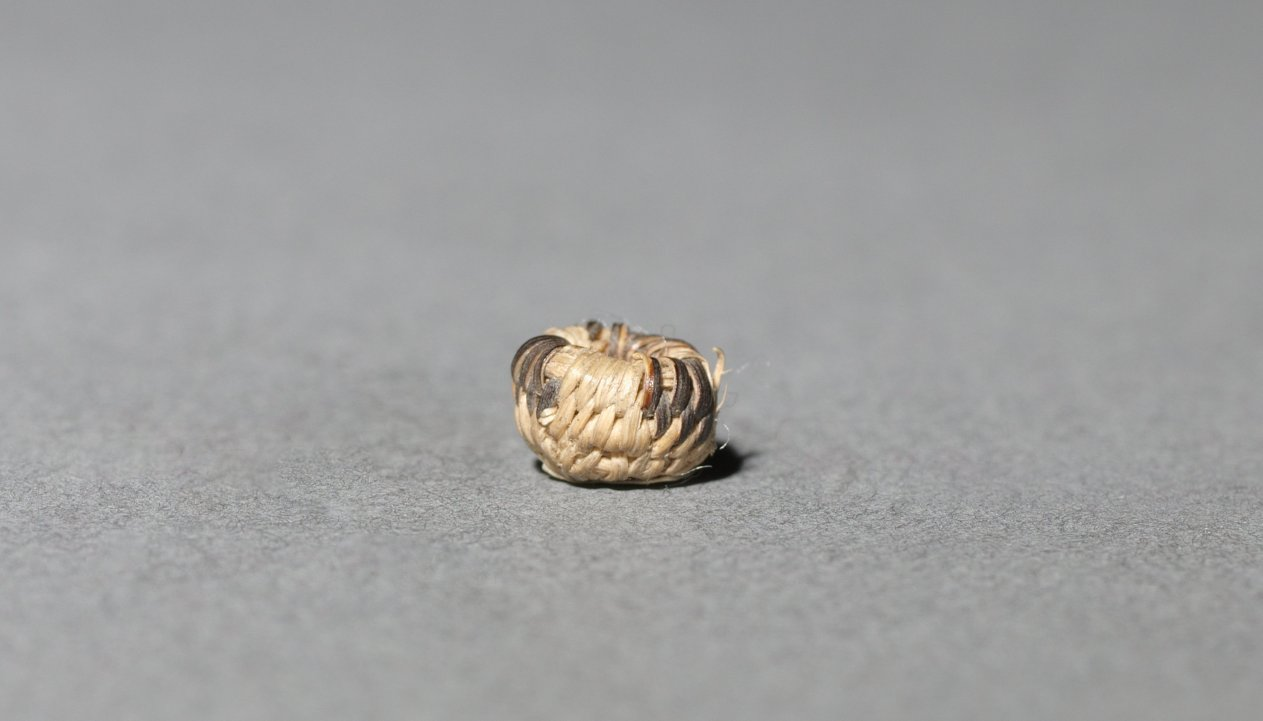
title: Miniature Basket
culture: America, Native North American, Southwest, Arizona, Akimel O'odham (Pima), Unassigned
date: before 1923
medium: plant fiber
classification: Basketry